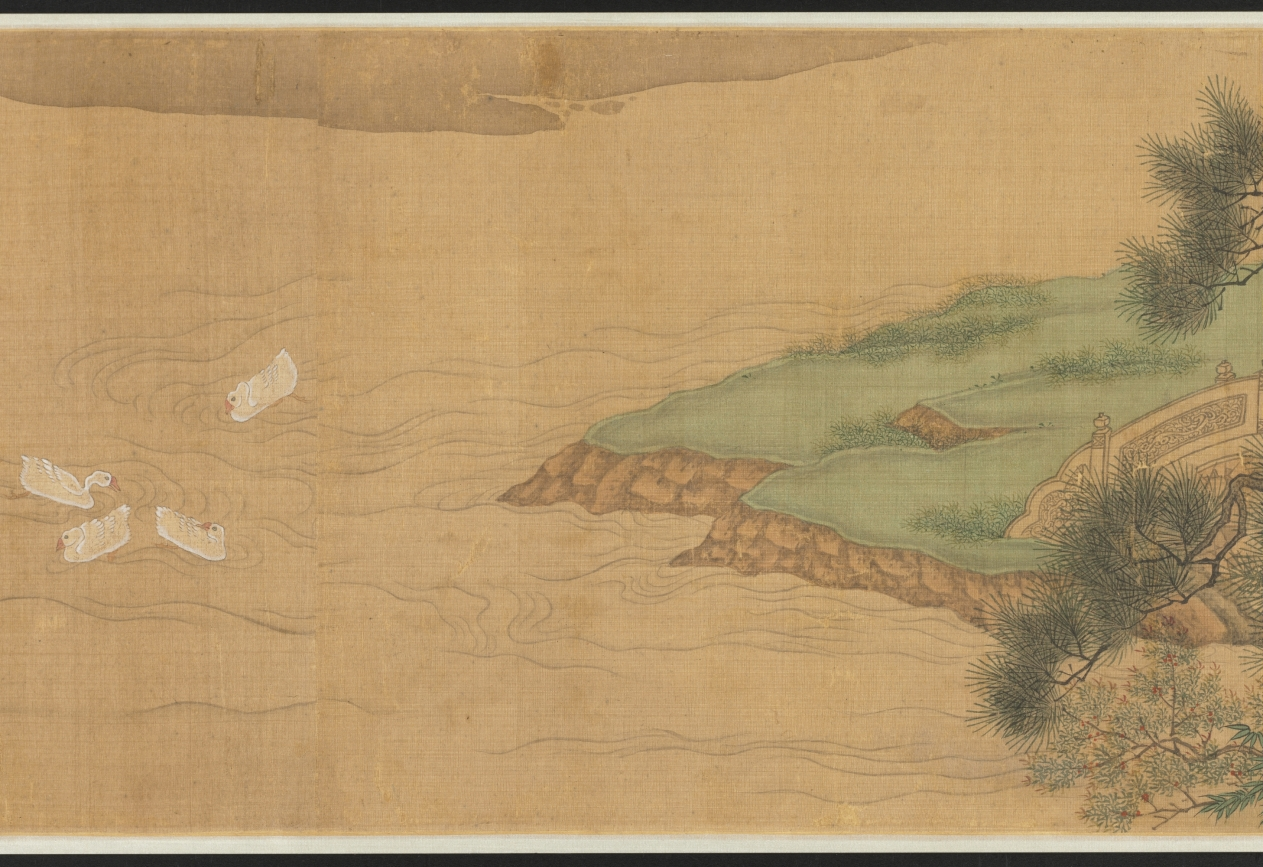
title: Purification at the Orchid Pavilion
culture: China, Qing dynasty (1644-1911)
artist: Fan Yi (Chinese, c. 1615–before 1688)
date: 1671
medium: Handscroll; ink and color on silk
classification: Painting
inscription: Artist's inscription, signature, and 2 seals: Painted by Fan Yi of Zhongfu during the second month of winter of the xinhai year [1671]. [2 seals] Fan Yi zhi yin, Zi yu yi.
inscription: Title on the frontispiece by Monk Yueshan (1629-1709).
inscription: 3 colophons and 13 additional seals: 1 colophon, dated 1707, and 6 seals of Yueshan; 2 colophons and 3 seals of Wong Kwan-Shut (Huang Junshi) 黃君實 (b. 1934); 2 seals of Fu Shen 傅 申 (b. 1937); 2 seals of Tessai Tomioka 富岡鐵齋 (1836-1924).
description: By the 1600s, the historic gathering at Lanting, Zhejiang province, in 353 CE was a common theme in Chinese painting. Originally based on a composition attributed to Li Gonglin (1049– 1106), now lost, Wu school artists revived the theme. Fan Yi, the brother of the artist Fan Qi from Nanjing, used delicate brushwork and luminous colors to depict the spring gathering.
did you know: The gathering’s host is in the Orchid Pavilion at the end of the scroll, representing an episode known as “Wang Xizhi Watching the Geese 王羲之觀鵝圖.”